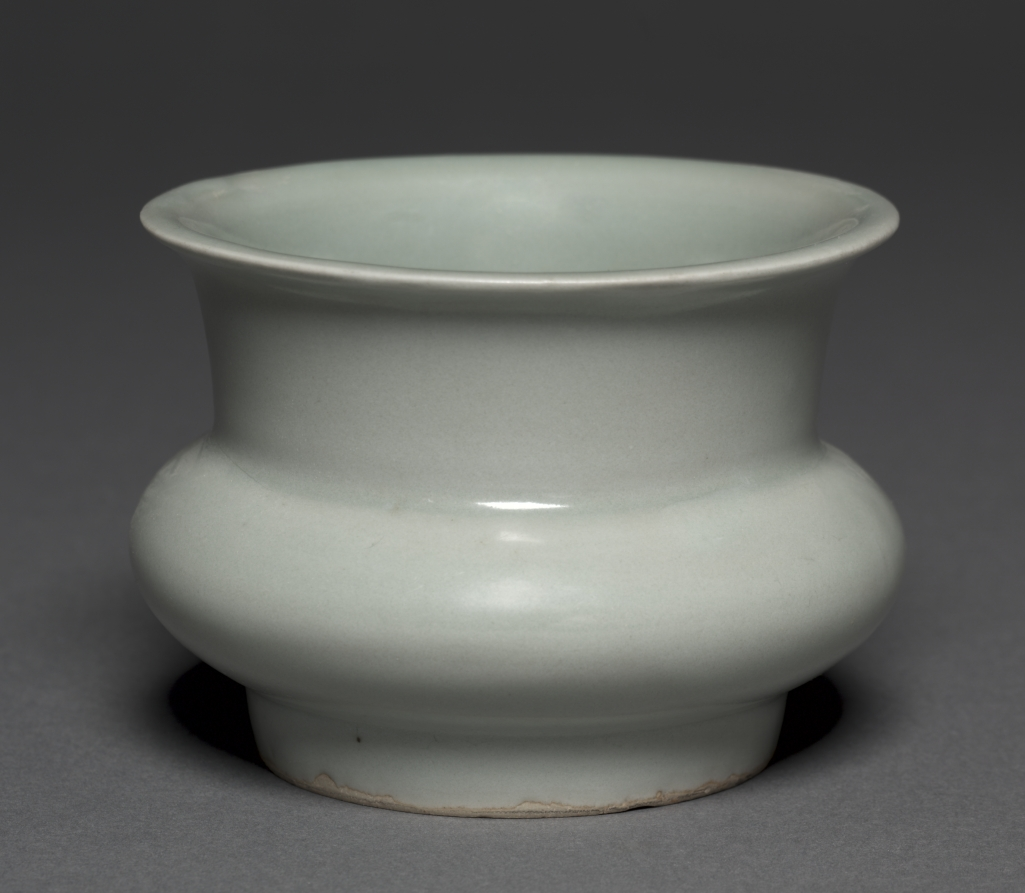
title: Vase in the Shape of a Grain Measure (Zhadou)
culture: China, Zhejiang province, Longquan region, Southern Song dynasty (1127-1279)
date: 1127–1279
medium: green-glazed porcelaneous stoneware, Longquan ware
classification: Ceramic